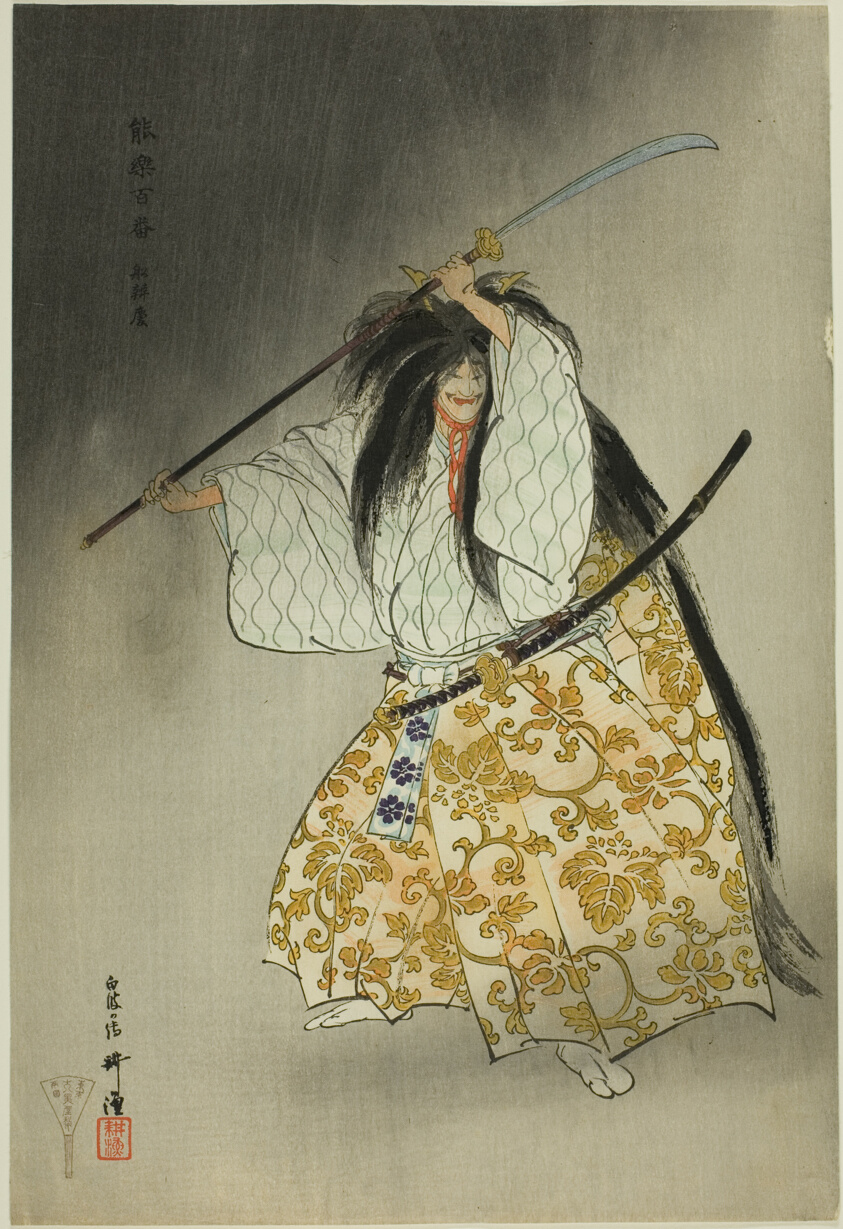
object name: Print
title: Funabashi, from the series "One Hundred No Dramas (Nogaku hyakuban)"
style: Japanese (culture or style)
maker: Tsukioka Kogyo; Japanese, 1869-1927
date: 1898/1903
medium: Color woodblock print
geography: Japan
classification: woodblock print; print; asian art